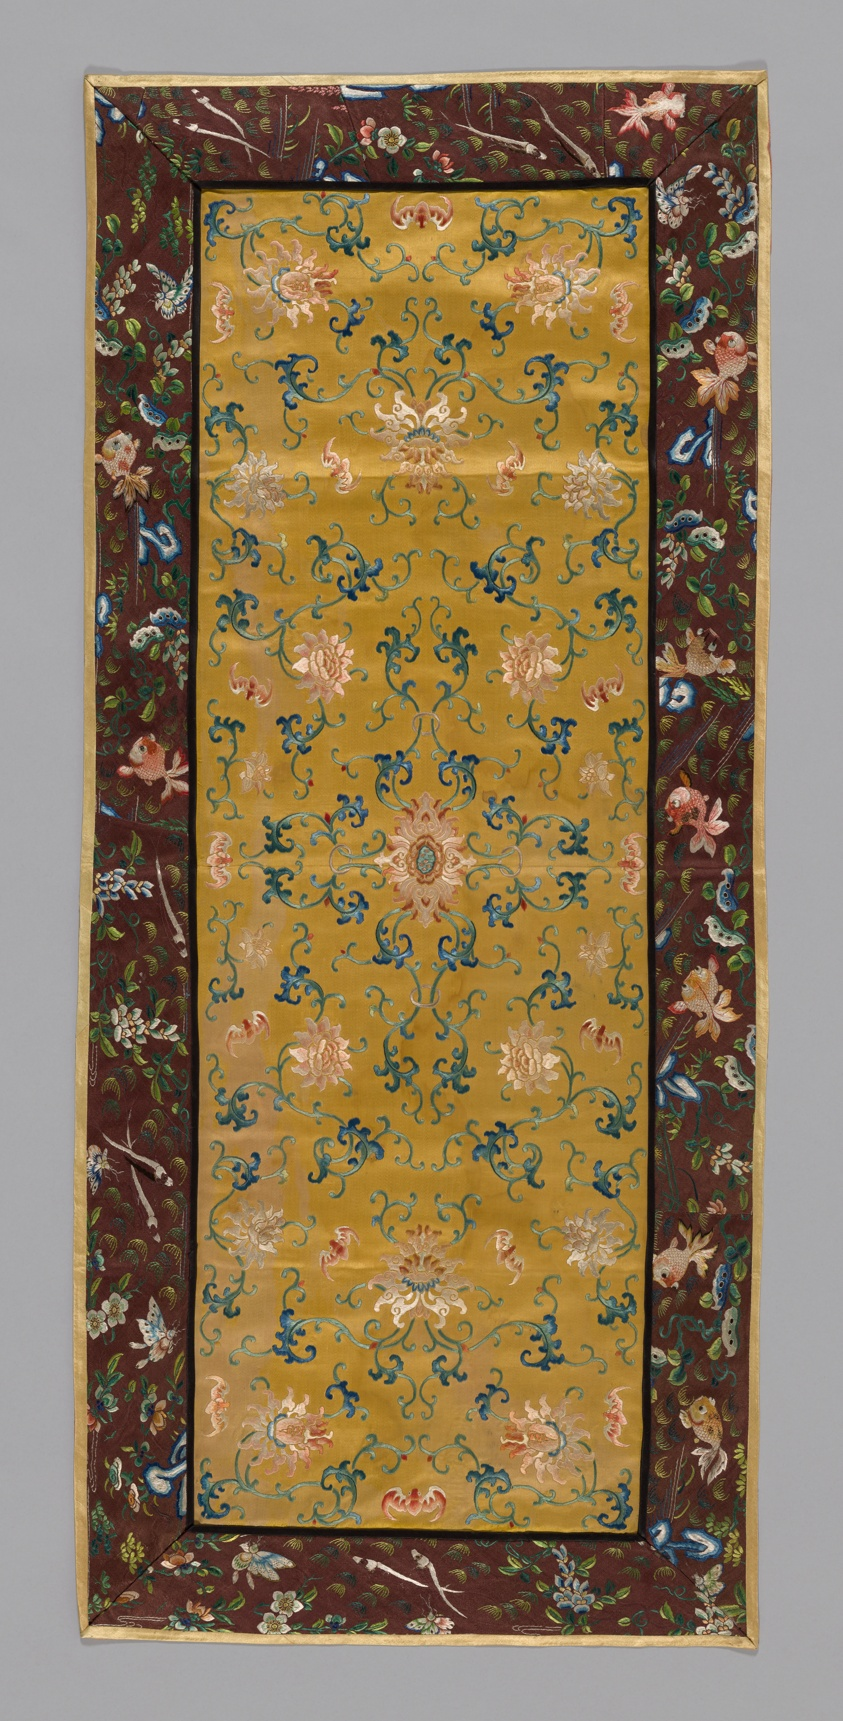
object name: Textile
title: Panel (Furnishing Fabric)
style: ming, Chinese (culture or style), East Asian, asian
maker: China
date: Qing dynasty (1644–1911), 1800/50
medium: Rectangular embroidered tablecover. Satin stitch and stem stitch and very slight couching on satin ground. Colors of salmon, green, blue, yellow, maroon, gold, with narrow yellow edge. Rectangular embroidered tablecover. Satin stitch and stem stitch and very slight couching on satin ground. Center panel: quadrisymmetrical design of lotus-peony scroll with I magnolia branch and flying bats. Flowers and bats in graded shades of salmon pink. Foliage in shades of green and blue. Yellow ground. Border: on maroon colored satin cut on the bias; fancy gold fish, water weeds, rocks and occasional flowers and butterflies in shades of yellow, salmon, green and blue. Scales on goldfish couched with gold. Narrow yellow edge on outside and black edgs on inside of border. Pale salmon lining, fancy simple cloth, suastika design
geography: China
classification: textile; weaving; needlework (visual works); furnishing textile